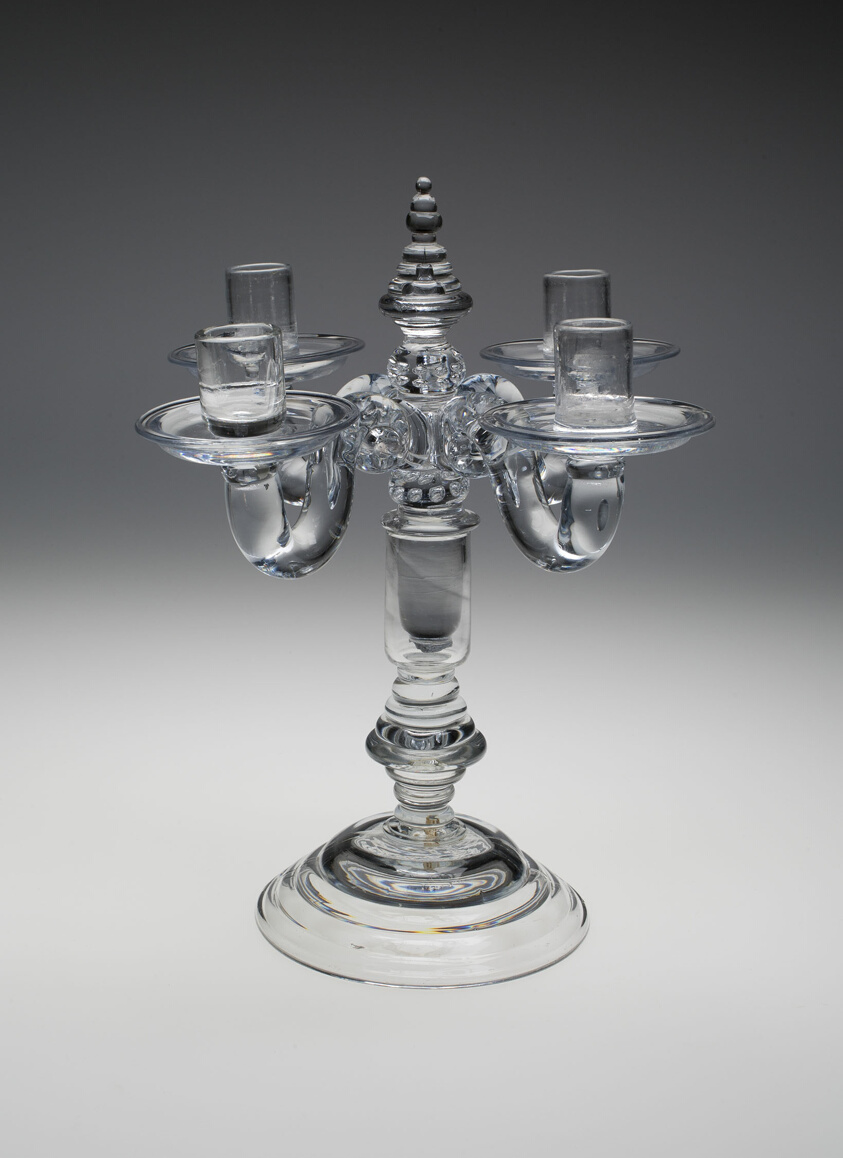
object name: Glass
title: Candelabra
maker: England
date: 1700–20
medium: Glass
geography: England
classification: candleholder - candelabra; candleholder; glass